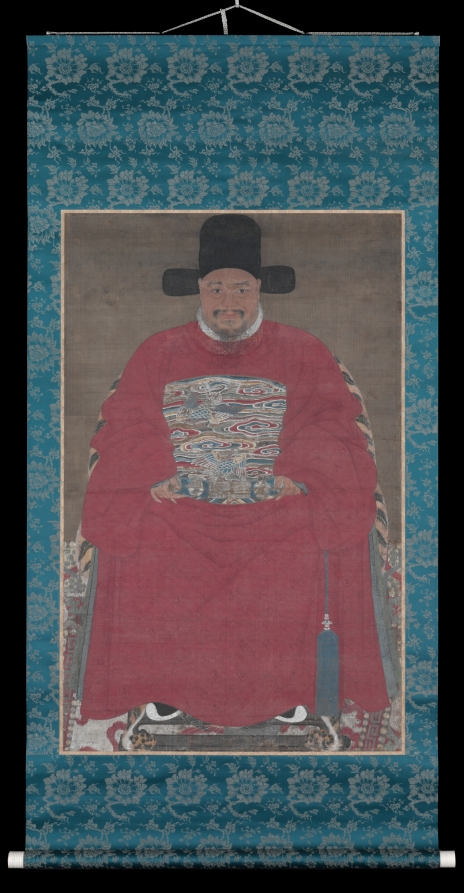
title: Portrait of an Official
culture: China, Ming dynasty (1368-1644) - Qing dynasty (1644-1911)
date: 1600s–1700s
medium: hanging scroll; ink and color on silk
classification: Painting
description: This official's portrait was done in the portrait painting style of the Ming dynasty.